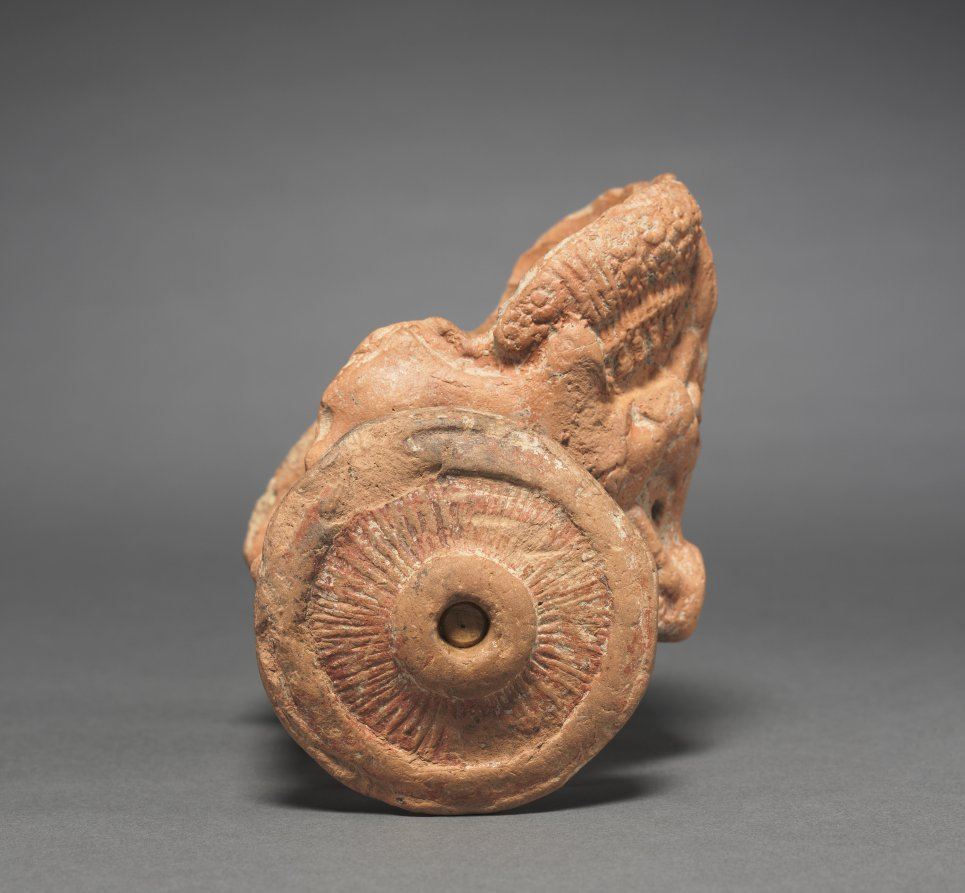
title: Model Chariot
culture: India, Shunga period (185–78 BCE)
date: 200s–100s BCE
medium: terracotta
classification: Sculpture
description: This terracotta chariot may have held a figurine of a hero or divinity for use on a domestic altar or as a toy. The two-wheeled conveyance is decorated with rows of flowers and bells. A charioteer and two horses, now indistinct, appear to have been carved onto the front.